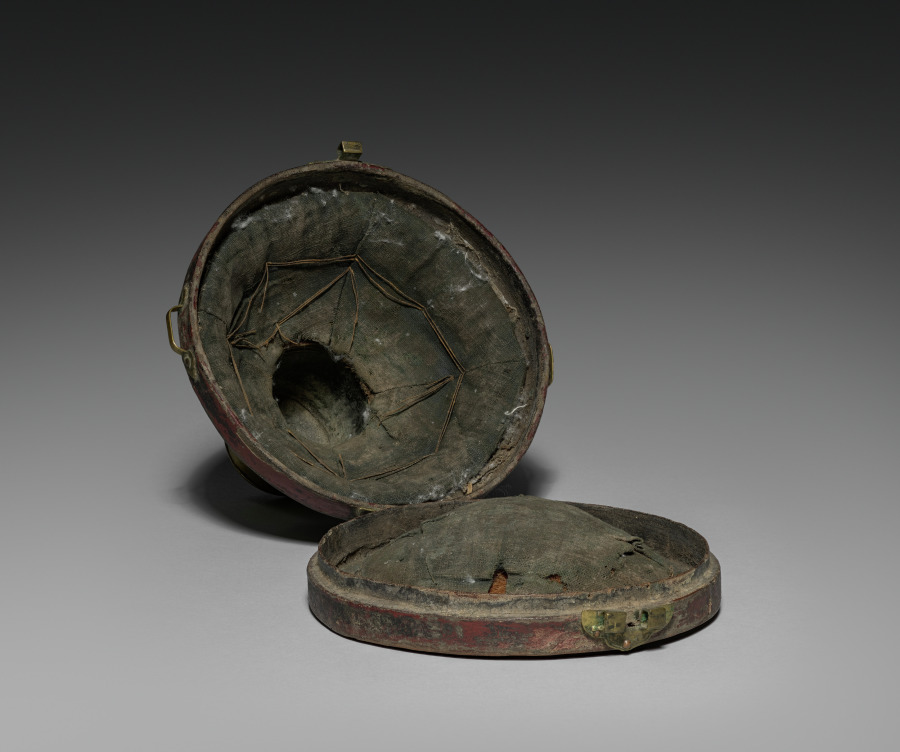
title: Stem Cup with Buddhist Emblems (case)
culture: China, Yuan dynasty (1271-1368)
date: 1300s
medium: wicker and wood with metal fittings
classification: Miscellaneous